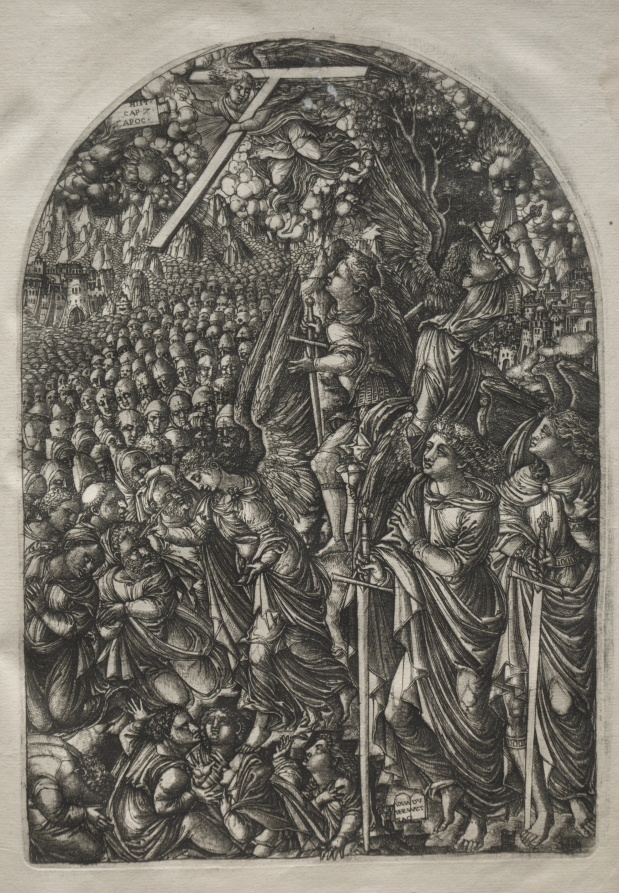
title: The Apocalypse: Four Angels Holding Back the Winds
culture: France, 16th century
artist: Jean Duvet (French, 1485–1561)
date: 1546–1556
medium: engraving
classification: Print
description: This print is part of a bound volume of works illustrating the a narrative of the Apocalypse, taken from the Revelation of Saint John in the Bible. The 23 engravings in the series occupied the artist for a number of years and represent his greatest artistic achievement. The museum's volume is one of only seven known complete sets. Jean Duvet was one of the first major printmakers in France and one of the most original artists of the 1500s. Although he worked mostly in the provincial city of Langres, he became aware of Italian art through the circulation of prints—notably those of Marcantonio Raimondi. His solidly modeled human figures reflect the influence of the Italian High Renaissance. Duvet, however, developed an idiosyncratic, highly artificial style with crowded compositions that ignore rational space in favor of ornamental surface patterns.